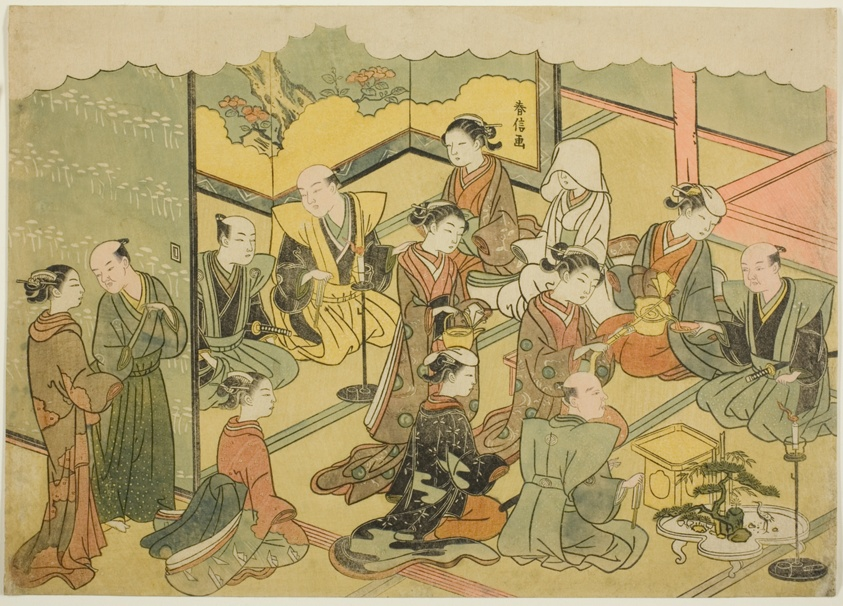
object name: Print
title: The Ceremonial Sake (Konrei sakazuki), the fourth sheet of the series "Marriage in Brocade Prints, the Carriage of the Virtuous Woman (Konrei nishiki misao-guruma)"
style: Japanese (culture or style)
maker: Suzuki Harunobu 鈴木 春信; Japanese, 1725 (?)-1770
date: c. 1769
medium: Color woodblock print; chuban yoko-e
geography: Japan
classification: woodblock print; print; asian art